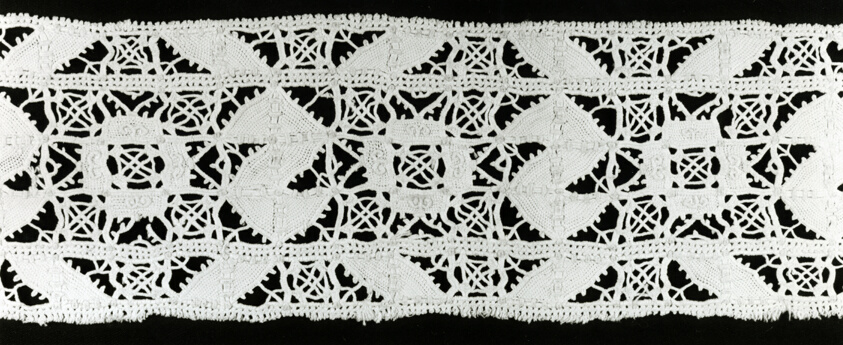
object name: Textile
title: Insertion (For a Cover)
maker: Italy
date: 1675/1725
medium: Linen, needle lace worked on plain weave cut and drawn thread work grid; embroidered in double hem and overcast stitches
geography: Italy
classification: textile; lace - needle